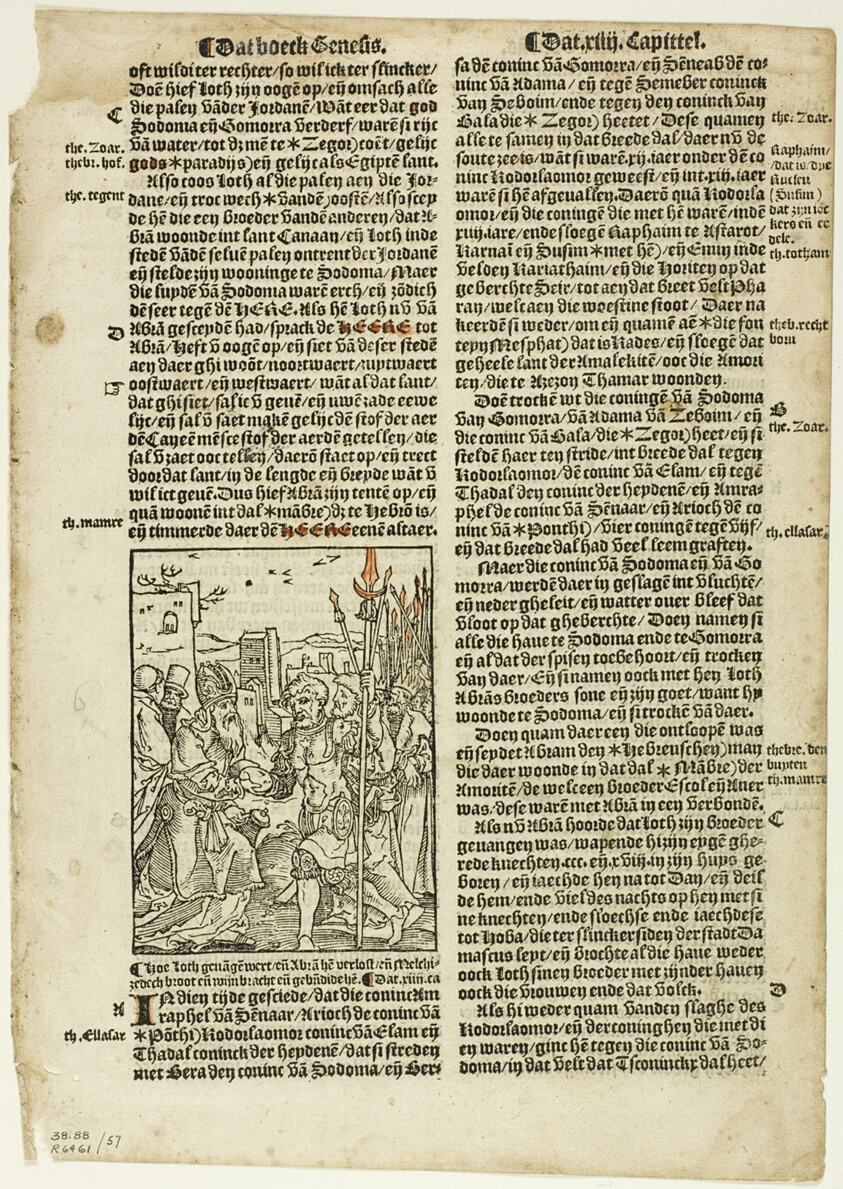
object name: Print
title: Illustration from Die Bibel (Vorsterman), plate 57 from Woodcuts from Books of the XVI Century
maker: Jan Swart (Netherlandish, c.1500-c.1560); assembled by Max Geisberg (Swiss, 1875-1943)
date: 1528, assembled into portfolio 1937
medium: Hand-colored woodcut on paper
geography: Netherlands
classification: woodcut; print; prints and drawing